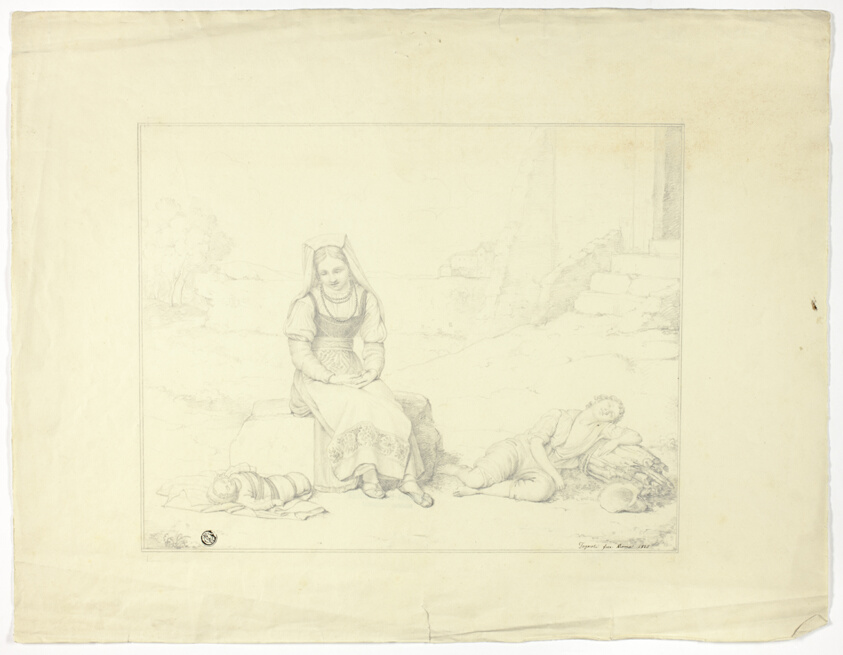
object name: Drawing and Watercolor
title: Roman Peasant Woman and Sleeping Children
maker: Giovanni Tognolli (Italian, 1786-1862)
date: c. 1825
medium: Graphite on cream wove paper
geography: Italy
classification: graphite; drawings (visual works); prints and drawing